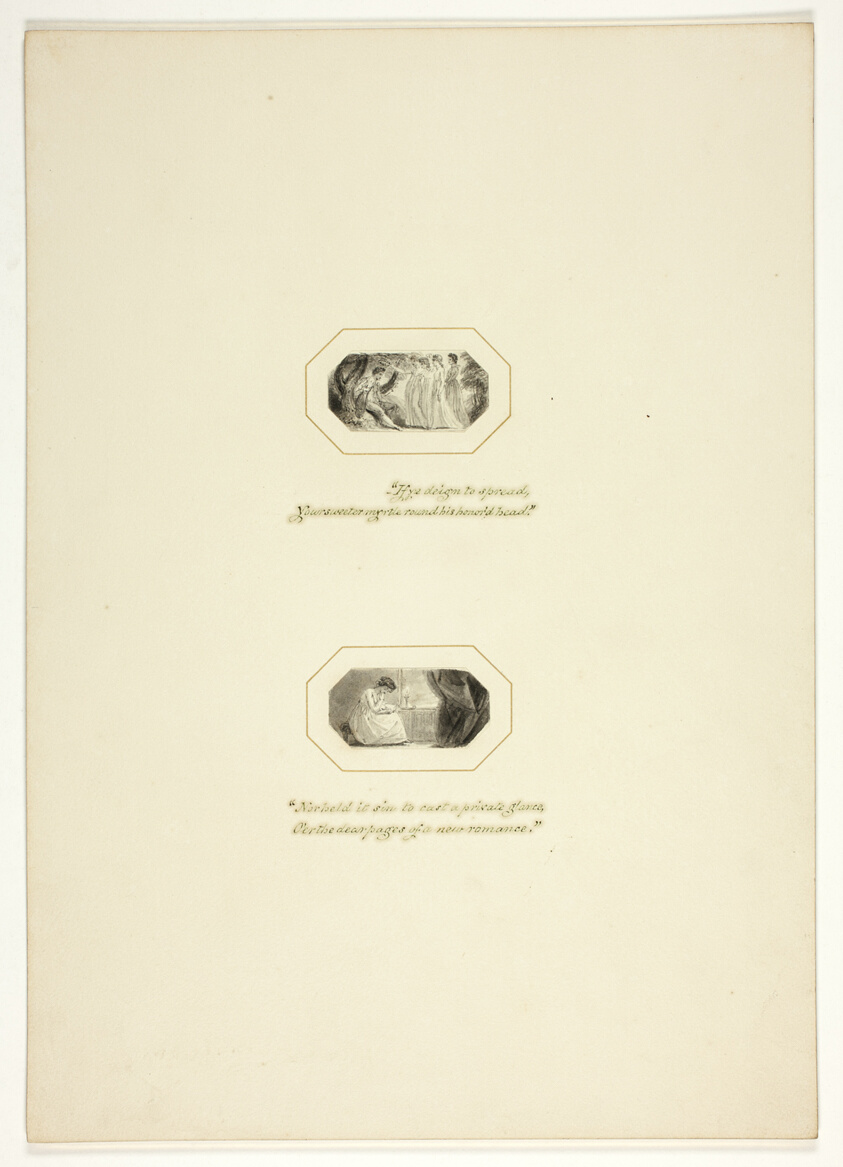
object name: Drawing and Watercolor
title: Study for a plate from The Triumphs of Temper, in the 1796 Royal Engagements Pocket Book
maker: Thomas Stothard (English, 1755-1834)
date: c. 1795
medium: Ink wash on paper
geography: England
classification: ink or chalk wash; drawings (visual works); prints and drawing